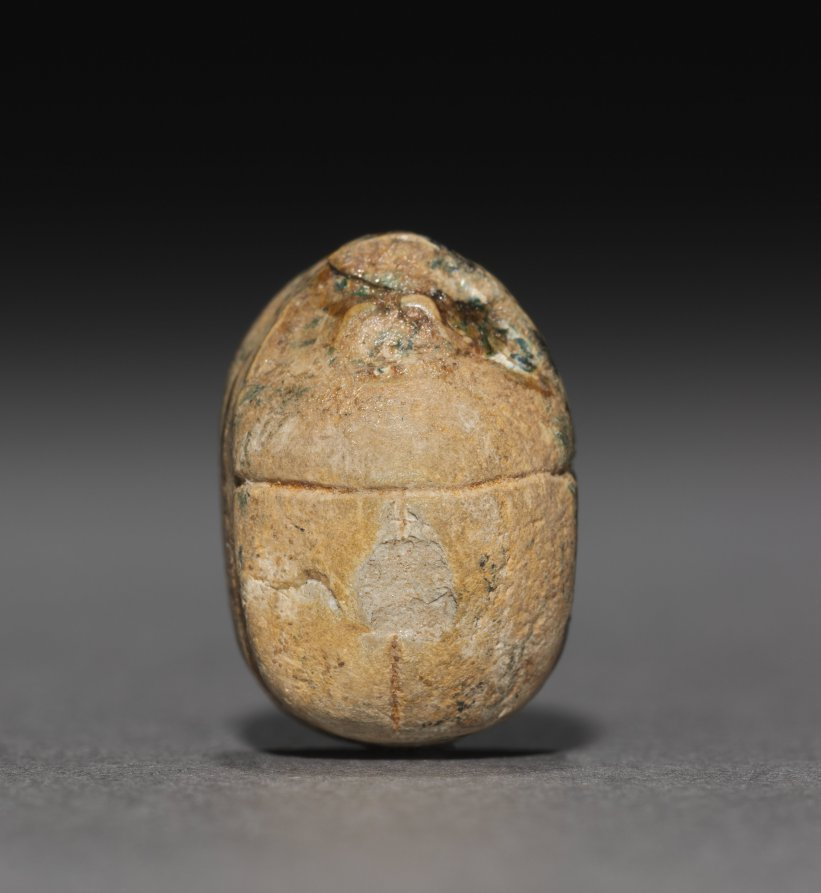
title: Scarab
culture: Egypt, Second Intermediate period (1648–1540 BCE)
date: 1648–1540 BCE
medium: turquoise-glazed steatite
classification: Scarabs